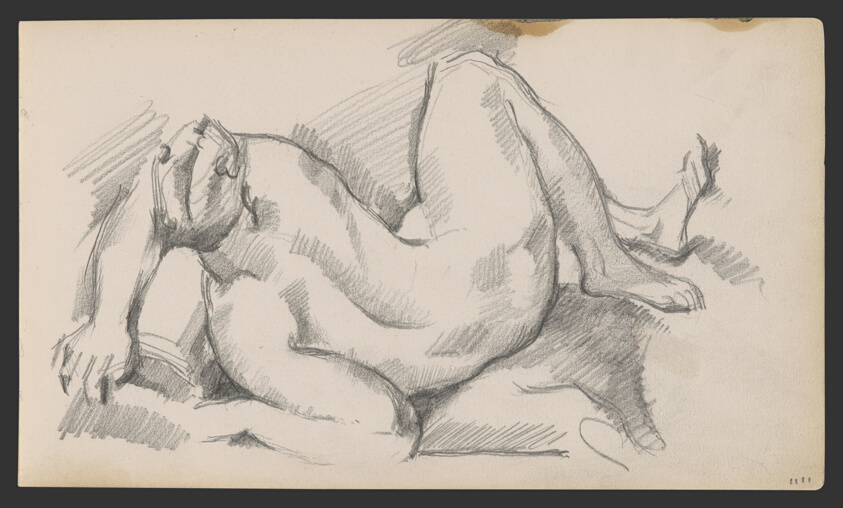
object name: Drawing and Watercolor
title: Sketchbook No. 2 (L'Estaque)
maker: Paul Cézanne; French, 1839-1906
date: 1875–86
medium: Graphite and pen and ink drawings on paper, bound into a book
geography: France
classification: sketchbook; graphite; prints and drawing; paper